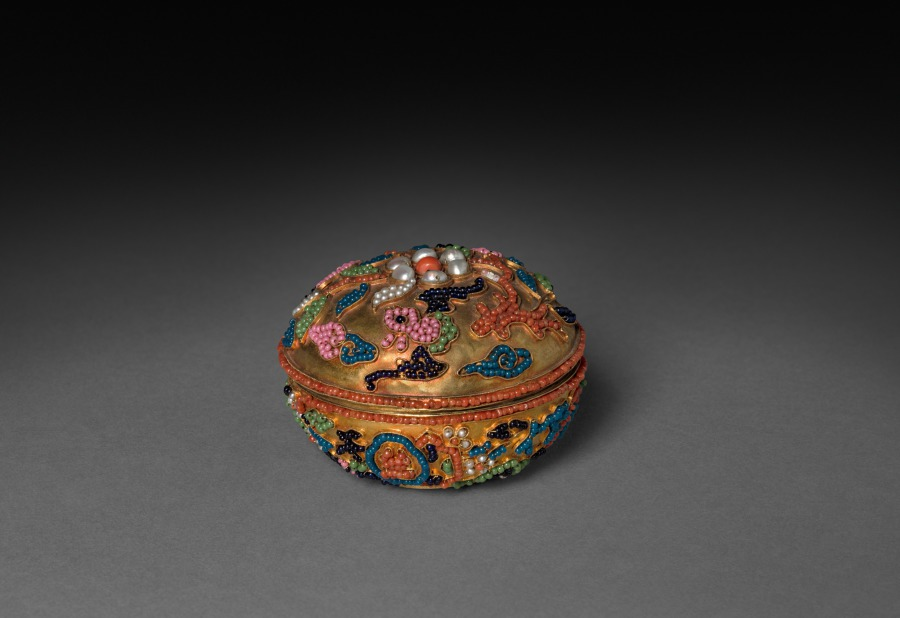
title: Box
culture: China, Qing dynasty (1644-1911)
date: 19th Century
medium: metal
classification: Metalwork